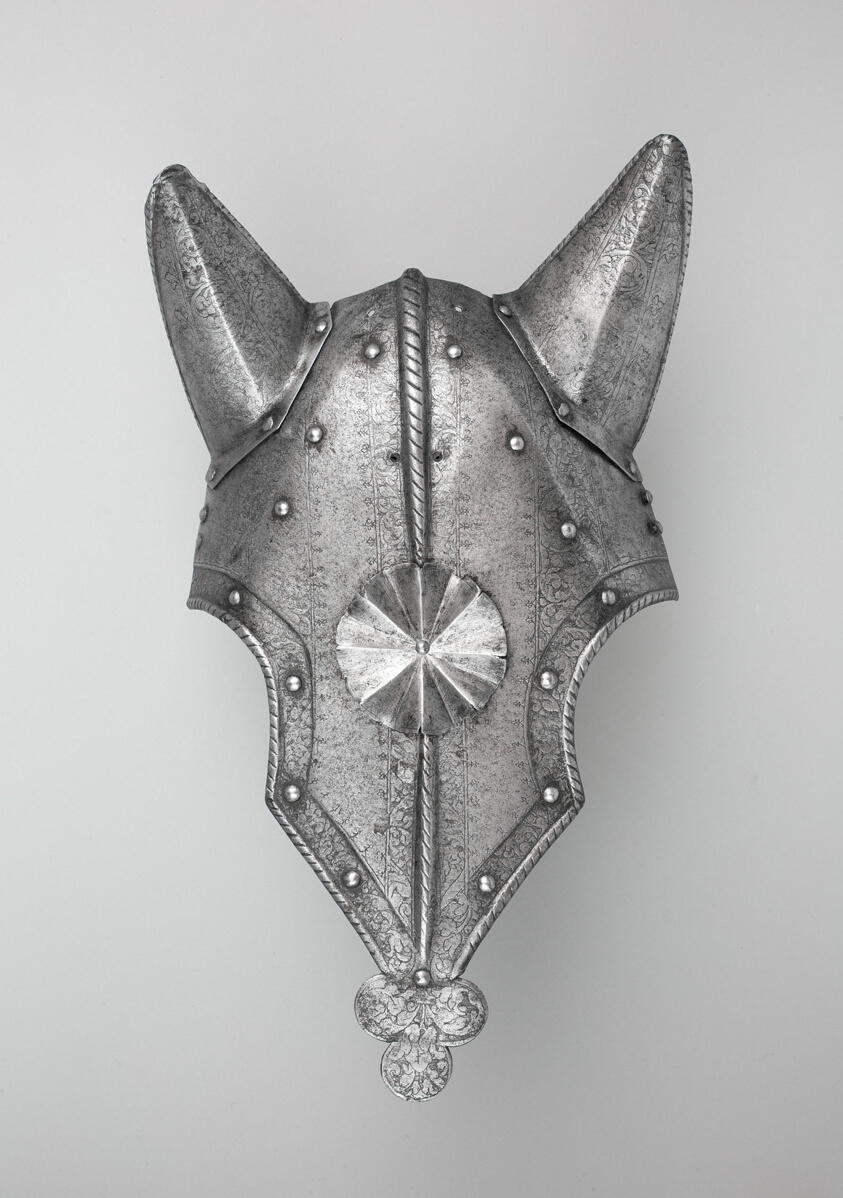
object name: Armor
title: Shaffron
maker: Italian (?)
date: 19th century in Italian style of c. 1560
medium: Steel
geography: Italy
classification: horse equipment; armor; arms and armor